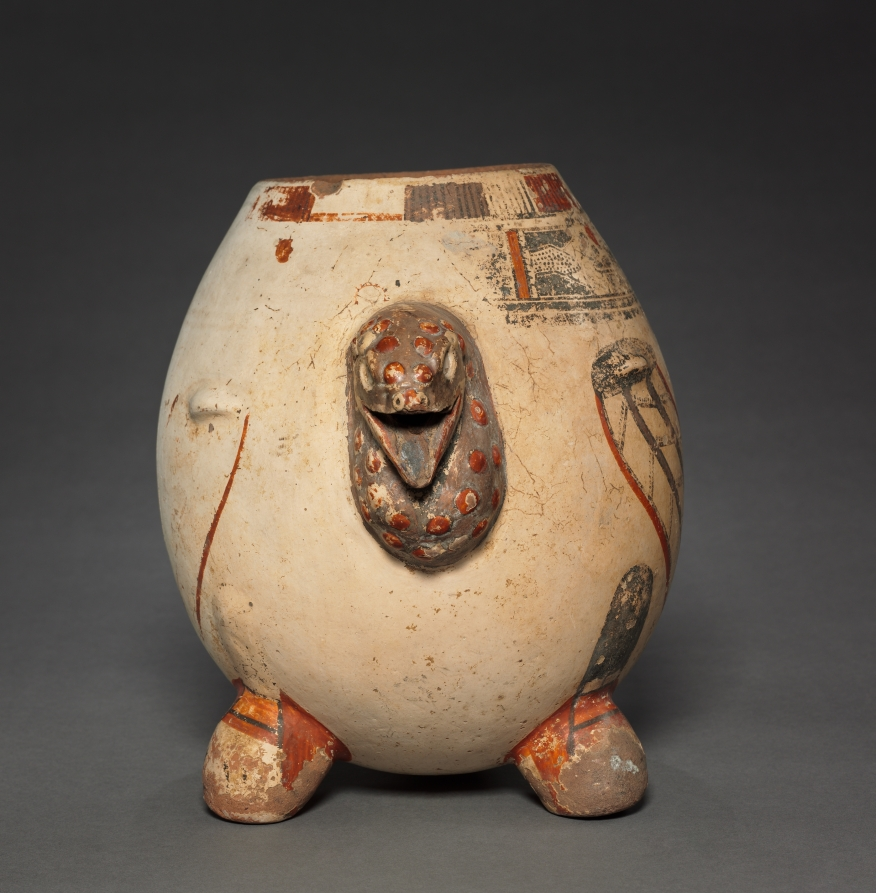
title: Footed Vase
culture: Costa Rica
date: 1000–1550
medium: earthenware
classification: Ceramic